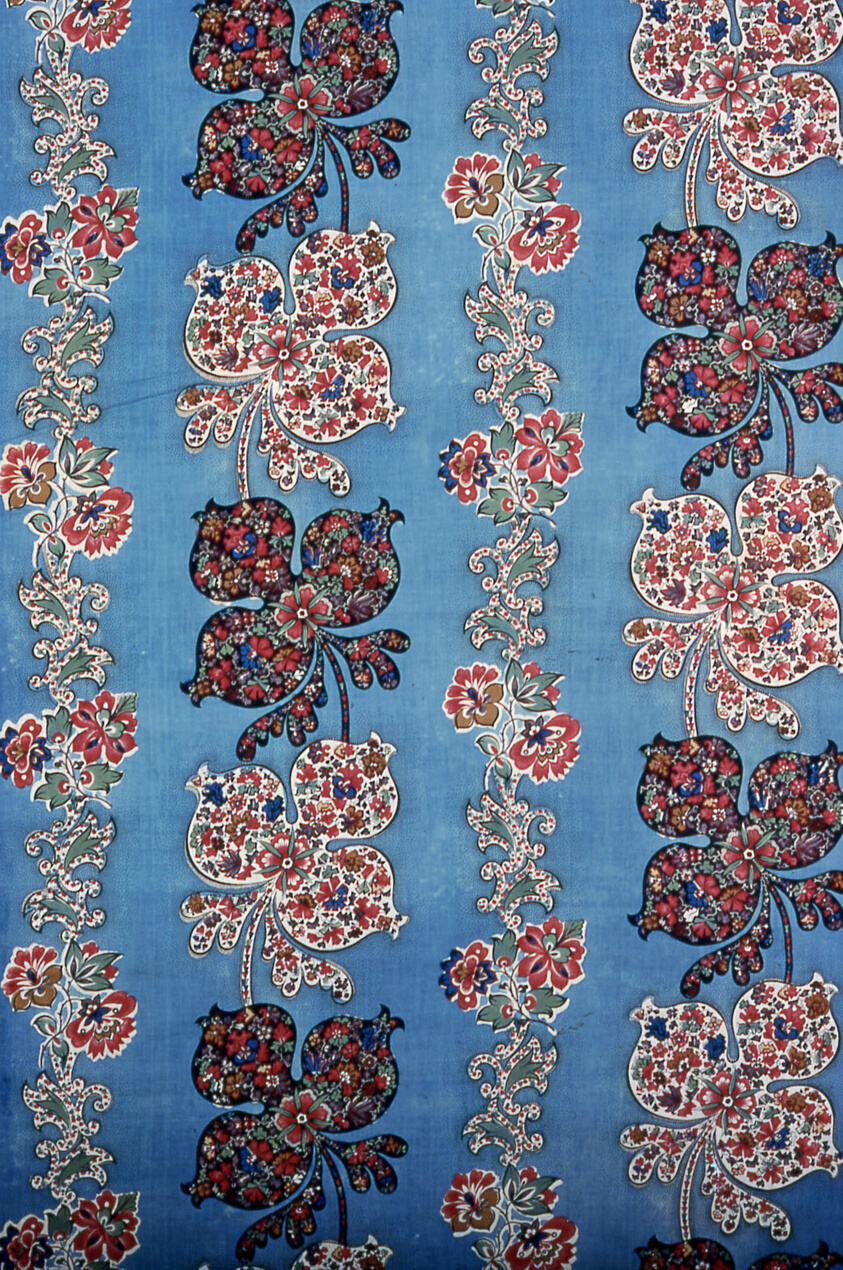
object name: Textile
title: Panel (Furnishing Fabric)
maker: England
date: 1801/25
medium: Cotton, plain weave; roller printed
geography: England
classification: textile; weaving - printed; furnishing textile